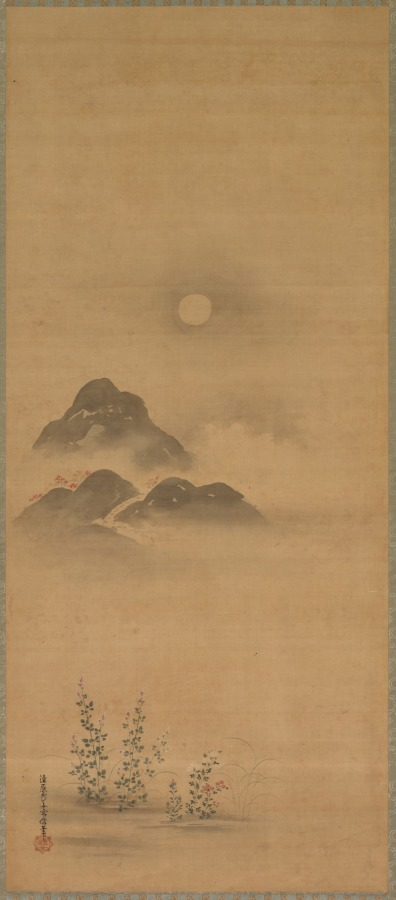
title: Minamoto no Nakakuni Visits Lady Kogō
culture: Japan, Edo period (1615–1868)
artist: Kiyohara Yukinobu (Japanese, 1643–1682)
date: late 1600s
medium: one of a triptych of hanging scrolls; ink and color on silk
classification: Painting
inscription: 款記「清原氏女雪信筆」/「清原女」朱文八角印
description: Kiyohara Yukinobu was one of Japan's earliest and most talented female painters. Kiyohara preferred Japanese-style painting techniques and subjects. Her work depicts the scenery and history of her native land. In addition to the tonalities of ink, she applied a delicate range of colors that help identify the seasons, an important theme in Japanese life and culture.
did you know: This nocturnal autumnal scene is the left part of a triptych presenting an episode from The Tale of the Heike.